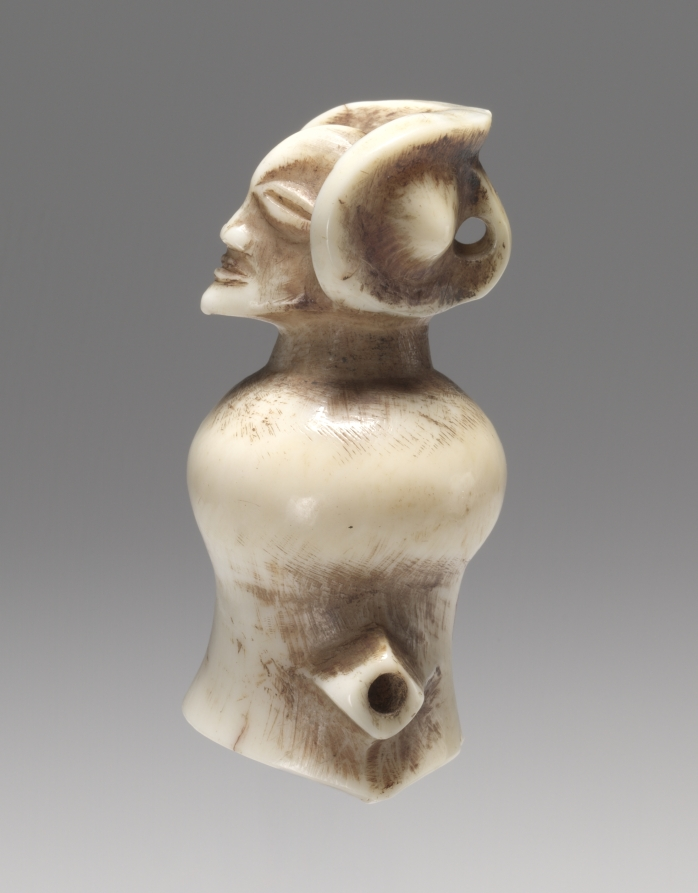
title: Whistle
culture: Africa, Central Africa, Democratic Republic of the Congo or Angola, Chokwe-style maker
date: late 1800s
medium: Probably hippopotamus ivory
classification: Musical Instrument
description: Carved out of ivory or wood in a variety of shapes, Chokwe whistles often bear miniature, stylized renderings of masks. Cikunza, the "patron saint" of the boys' initiation into manhood, is depicted with a pointed extension imitating the horn of a road antelope, symbolizing the fertility spirit. Typically such whistles were used by men during the hunt to communicate with their co-hunters and to call their dogs. They were either worn attached to a string as a necklace or tied to a spear.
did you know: This whistle is the first piece from sub-Saharan Africa acquired by the CMA.